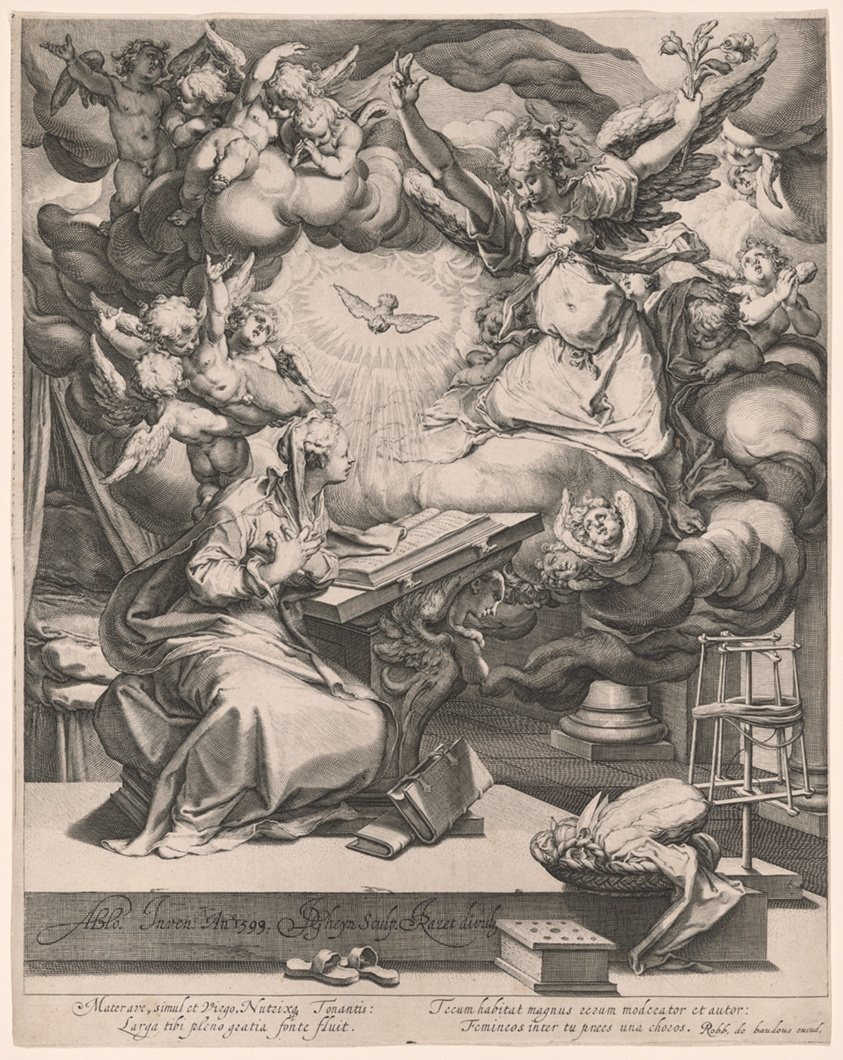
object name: Print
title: The Annunciation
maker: Jacques de Gheyn II (Dutch, 1565–1629); after Abraham Bloemaert (Dutch, 1566–1651)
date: 1593, printed 1599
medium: Engraving on ivory laid paper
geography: Netherlands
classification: print; paper; prints and drawing; engraving